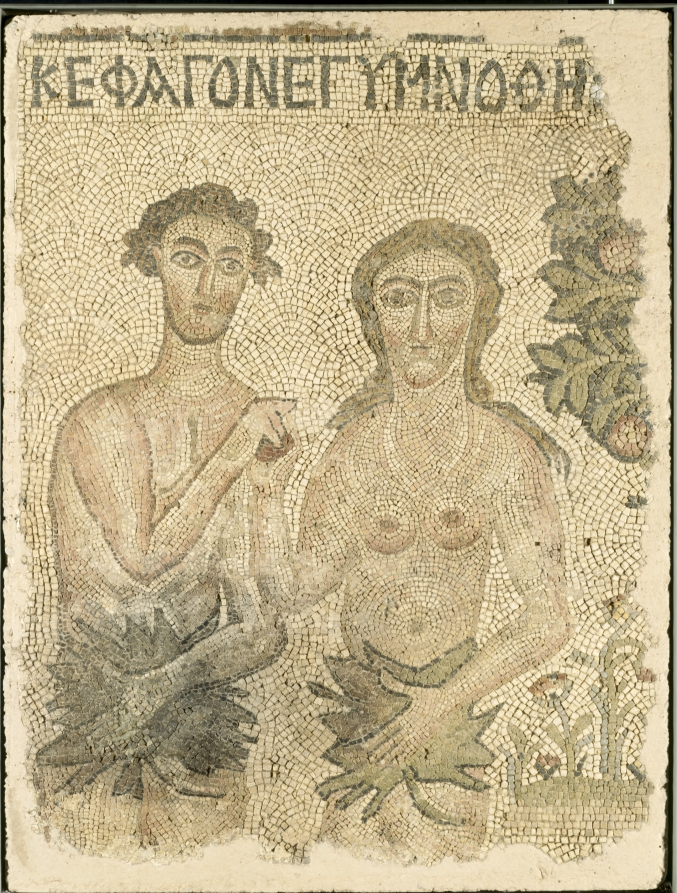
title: Fragment of a Floor Mosaic: Adam and Eve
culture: early Byzantium, Northern Syria, Byzantine period, late 5th-early 6th century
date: late 400s–early 500s CE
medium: marble and stone tesserae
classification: Mosaic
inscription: ΚΕΘΑΓΟΝΕΓΥΜΝΟΘΗ (Κ’ΕΘΑΓΟΝ ΕΓΥΜΝΟΘΗ[ΣΑΝ] = κ[αι] ἔφαγον ἐγυμνώθη[σαν])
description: This mosaic panel representing the Fall of Adam and Eve once formed part of a much larger mosaic decorating the floor of an early Byzantine church in northern Syria. Here, Adam and Eve are portrayed sharing the forbidden fruit while covering themselves with large leaves. At the top of the panel, a Greek inscription reads, "And they ate and they were made naked," recalling the biblical text (Gen. 3:7) and highlighting the two moments in the biblical narrative of the Fall that are depicted here.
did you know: In the Syrian village where this mosaic was created, few people could read and even fewer had access to books. The images within the church educated the community, leading 5th-century Pope Gregory the Great to describe religious images as "books for the illiterate."